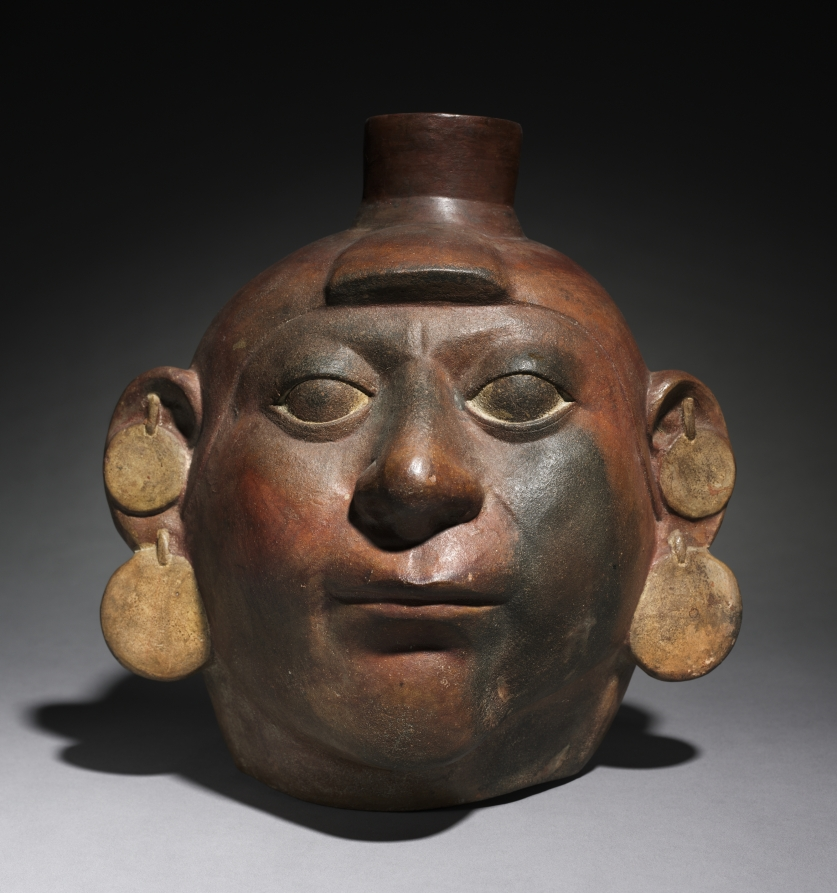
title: Portrait Head Vessel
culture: Peru, North Coast, Moche style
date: 200–550 CE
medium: earthenware with colored slips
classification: Ceramic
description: The Moche were unique in ancient Peru in creating realistic human portraits, usually in the form of ceramic vessels. This large example may represent an important captive who, like some Moche prisoner figures, wears double earrings and a hank of hair over the forehead.